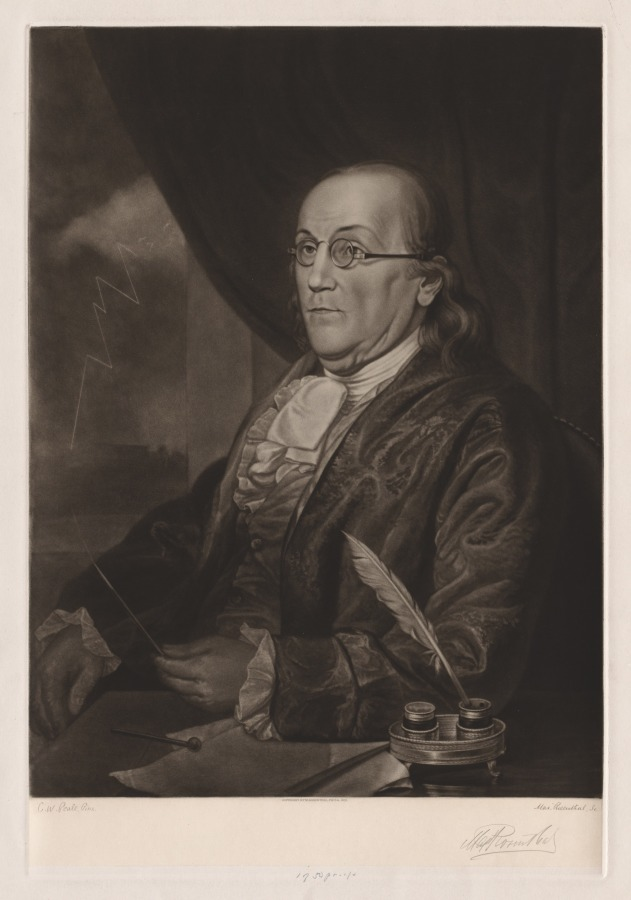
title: Benjamin Franklin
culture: America, early 19th Century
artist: Max Rosenthal (American, 1833–1918)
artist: after Charles Willson Peale (American, 1741–1827)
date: 1901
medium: mezzotint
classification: Print